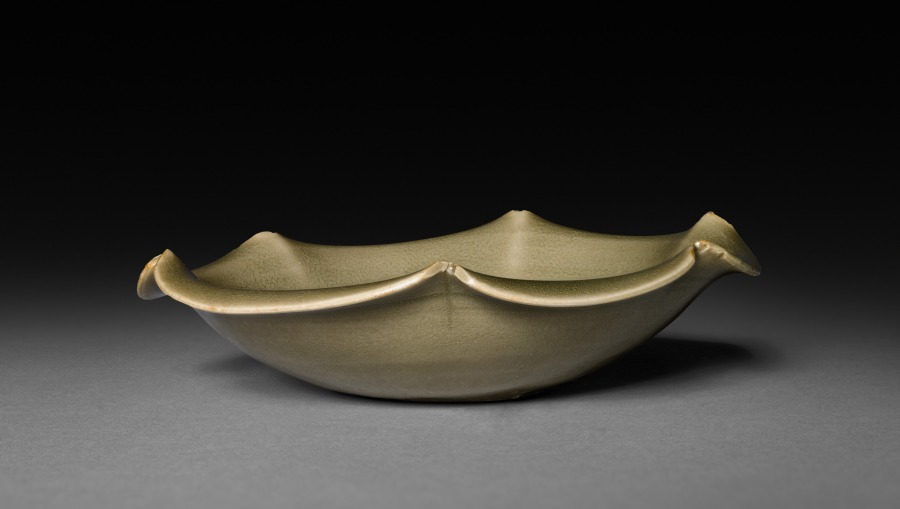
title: Foliated Saucer: Yaozhou Ware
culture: China, Shaanxi province, Northern Song dynasty (960-1127)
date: late 1000s-early 1100s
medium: glazed porcelain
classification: Ceramic